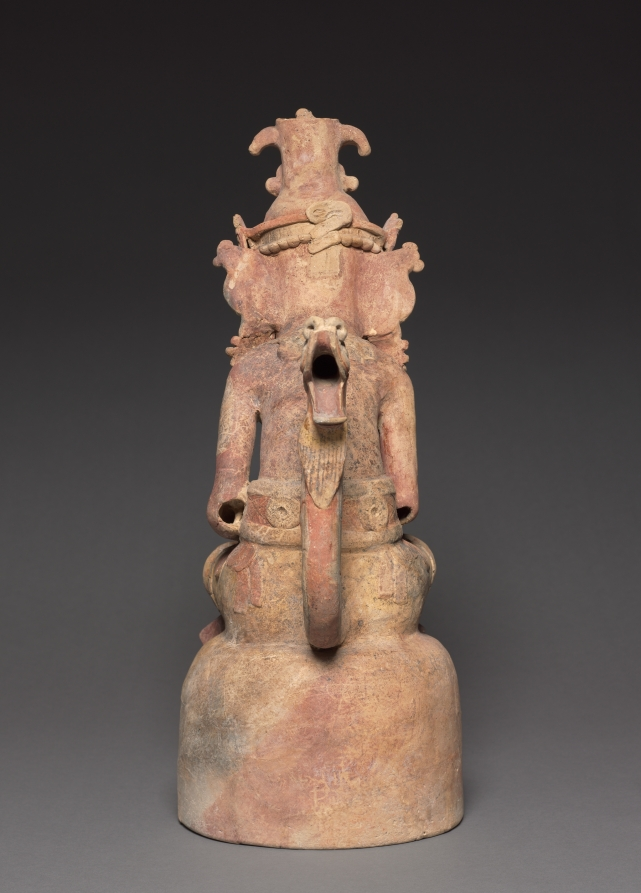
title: Artisan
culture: Guatemala, Petén region, Maya style (250-900), Maya style (250-900)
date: 250–600 CE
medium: earthenware with colored slips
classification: Sculpture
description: These figures represent the supernatural patrons of the visual arts and writing: the brothers Hun Batz and Hun Chuen ("One Monkey" and "One Artisan"). The two were refined artists but also bullies who tormented their younger brothers, who took revenge by transforming their elders into monkeys. Many Maya representations of the painter-scribes immortalize this fate by depicting the pair with both simian and human features, as here. The brothers are shown engaged in artistic or scribal pursuits. Sitting on high-domed bases that may have served as the lids of incense or offering bowls, each apparently once grasped a tool in his upper hand-for instance, a paint brush or a stylus for writing. In the lower hand, one cradles a small mask and the other, a piece of bark that likely refers to the beaten bark from which the Maya made books.